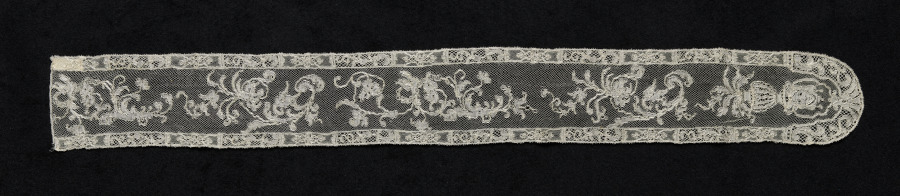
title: Lace Lappet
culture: France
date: 1780–99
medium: Silk: bobbin lace (Mechelen blonde lace)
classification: Lace